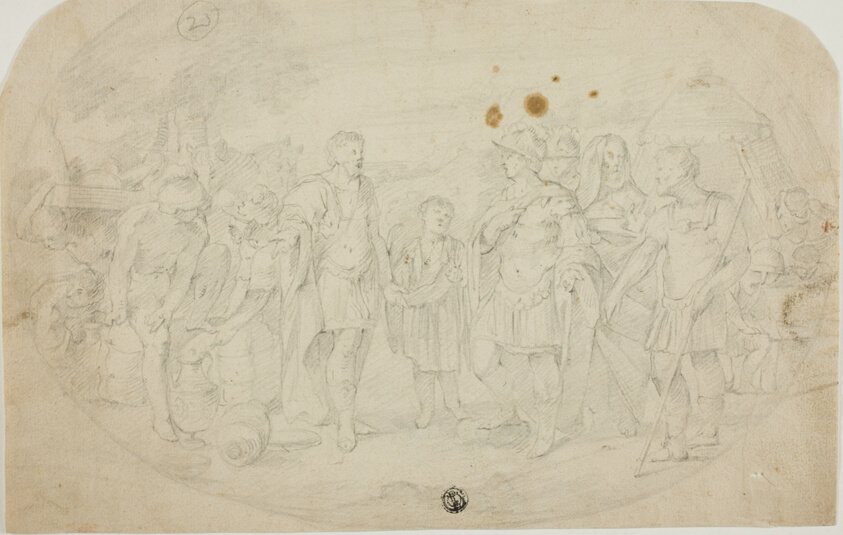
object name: Drawing and Watercolor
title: Alexander the Great and King Taxiles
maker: After Sisto Badalocchio; Italian, 1581-1647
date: c. 1615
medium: Graphite on cream laid paper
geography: Italy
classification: graphite; drawings (visual works); prints and drawing